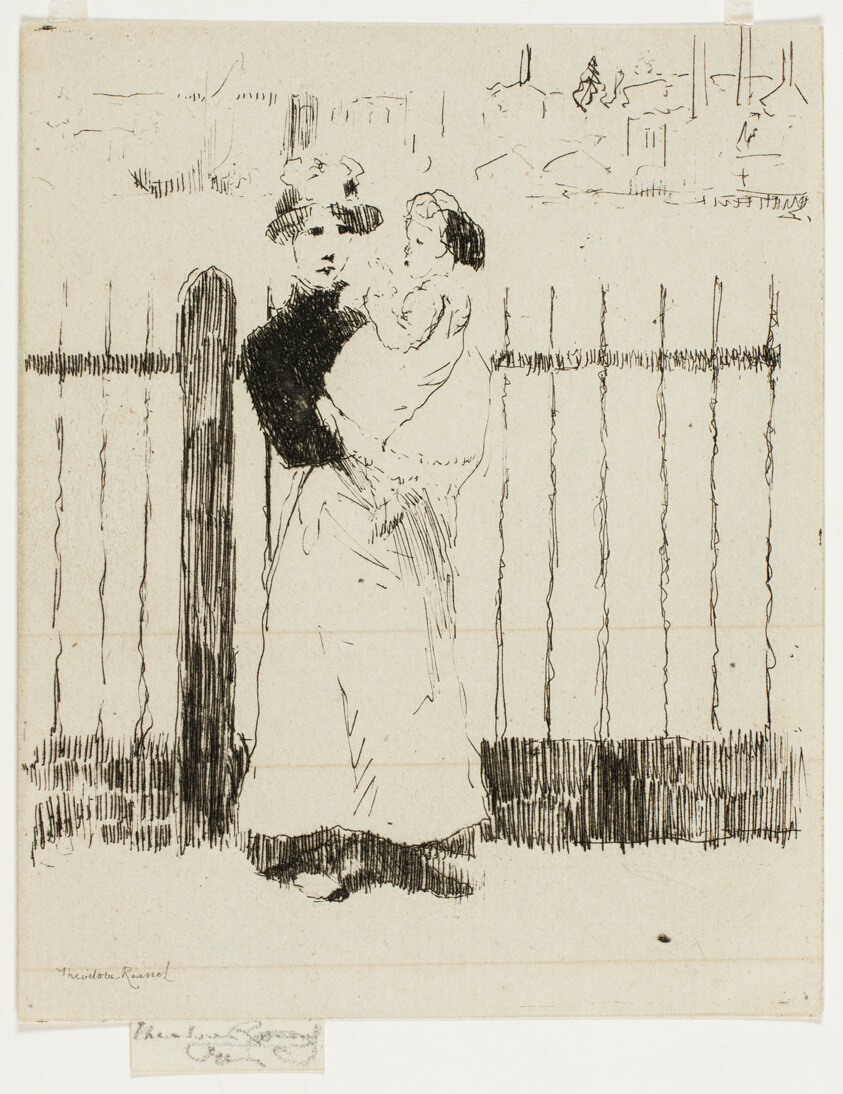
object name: Print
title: Emma and Her Baby, Chelsea Embankment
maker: Theodore Roussel (French, worked in England, 1847-1926)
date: 1888–89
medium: Etching in black on cream laid paper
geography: England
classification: etching; paper; print; prints and drawing